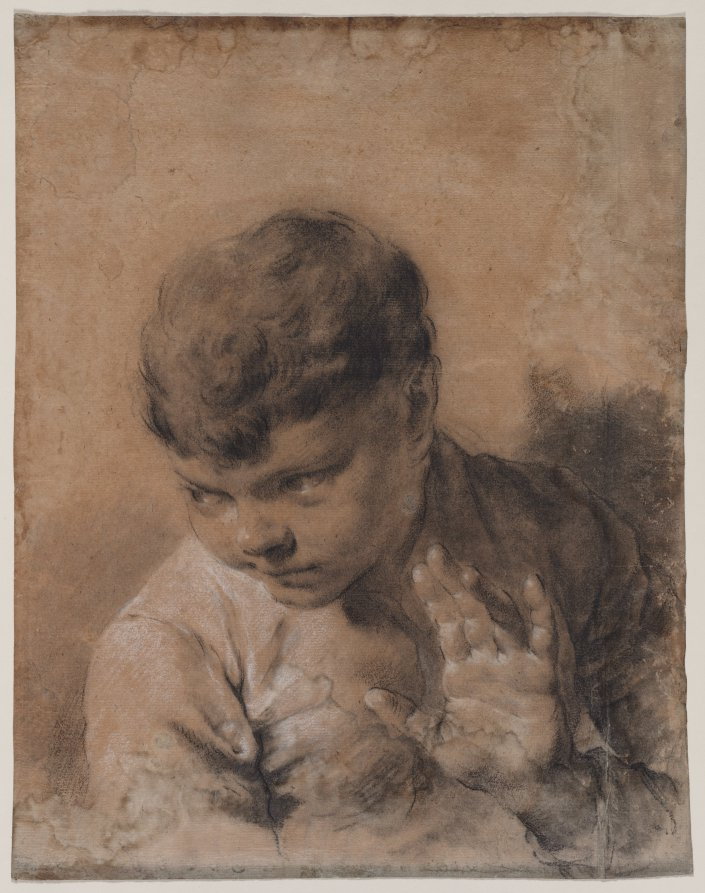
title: A Portrait of the Artist's Son Giacomo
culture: Italy, Venice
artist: Giovanni Battista Piazzetta (Italian, 1682–1754)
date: c. 1735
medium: black chalk heightened with white chalk, with stumping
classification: Drawing